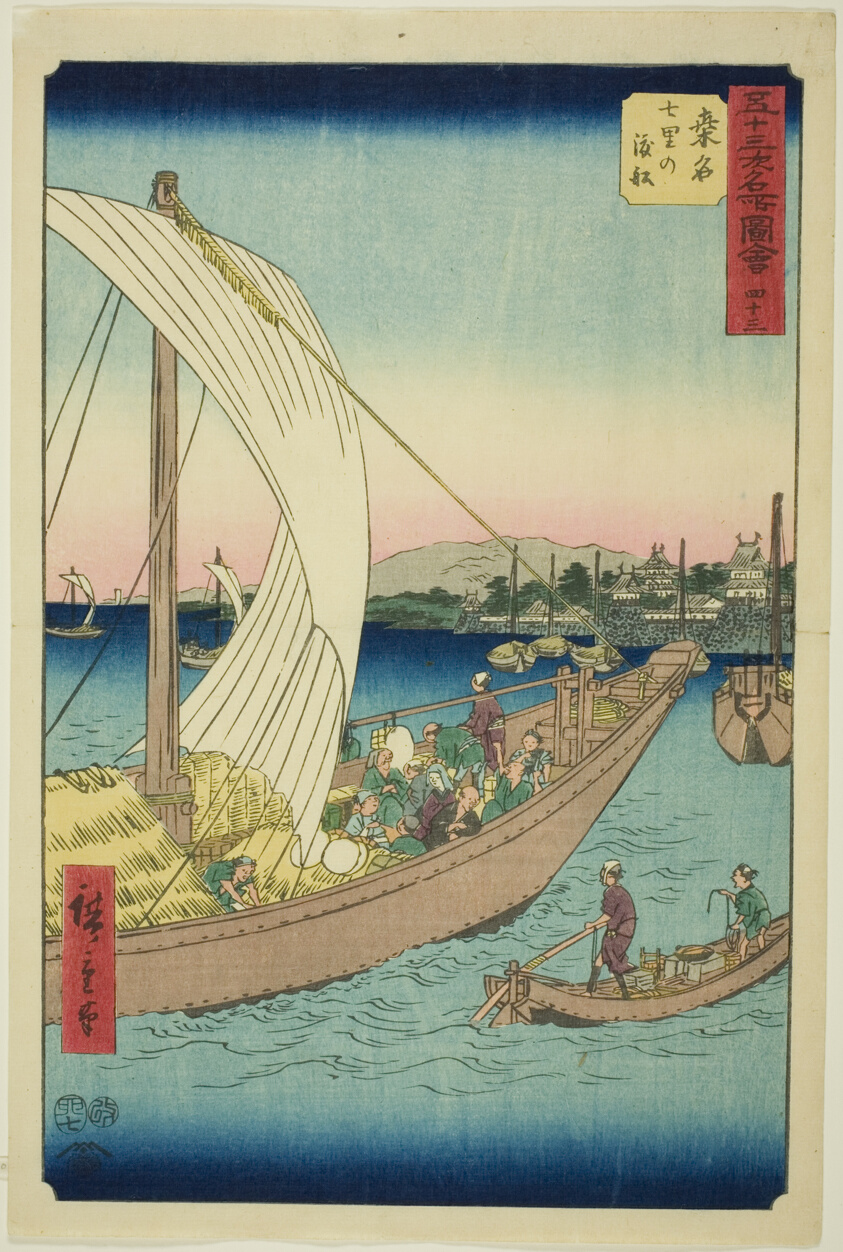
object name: Print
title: Kuwana: Ferryboats at Shichiri (Kuwana, Shichiri no watashibune), no. 43 from the series "Famous Sights of the Fifty-three Stations (Gojusan tsugi meisho zue)," also known as the Vertical Tokaido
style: Japanese (culture or style)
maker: Utagawa Hiroshige 歌川 広重; Japanese, 1797-1858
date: 1855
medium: Color woodblock print; oban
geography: Japan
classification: print; asian art